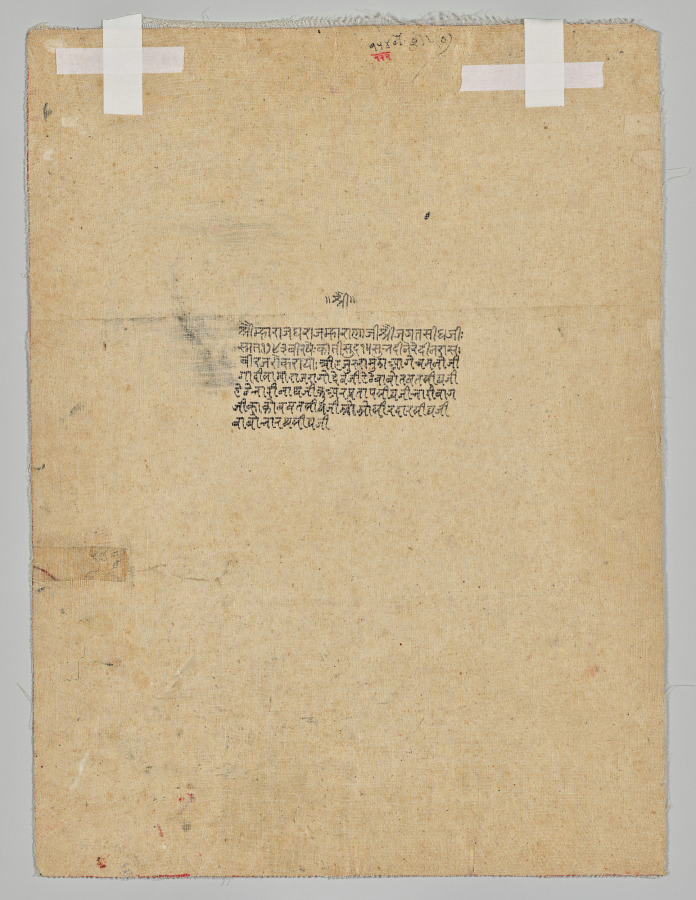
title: Maharana Jagat Singh Attending the Raslila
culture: Northwestern India, Rajasthan, Mewar, Udaipur, 18th century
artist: attributed to Jai Ram (Indian, active 1710–40)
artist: and/or Jiva (Indian, active mid-1700s)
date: 1736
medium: Gum tempera, gold, and silver on paper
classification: Painting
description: To celebrate the New Year festival of Diwali, dancers reenact the life story of the Hindu god Krishna in a palace courtyard by candlelight under the full moon. The king, a vassal of the Mughal emperor, sits with the halo of divine sanction for his rule at the left of the courtyard, smoking from a golden goat-shaped hookah, with his young son and heir at his side. At the top of the composition, a dancer dressed in blue with a peacock-feather crown plays the part of Krishna. In the upper right corner, a canopy painted with swirling storm clouds stands for the rainstorm sent by the jealous king of the gods, who is shown in the middle of the canopy with his consort and mount, the elephant with seven trunks. Guards and grooms in the foreground entertain themselves with music while they wait with the horses of visiting nobles. The formal geometric gardens, playful use of perspective, and individualized portraiture indicate the selective adoption of the styles and sensibilities of the imperial Mughal court in the paintings from this large-format series.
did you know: This painting is one of a set of eight.